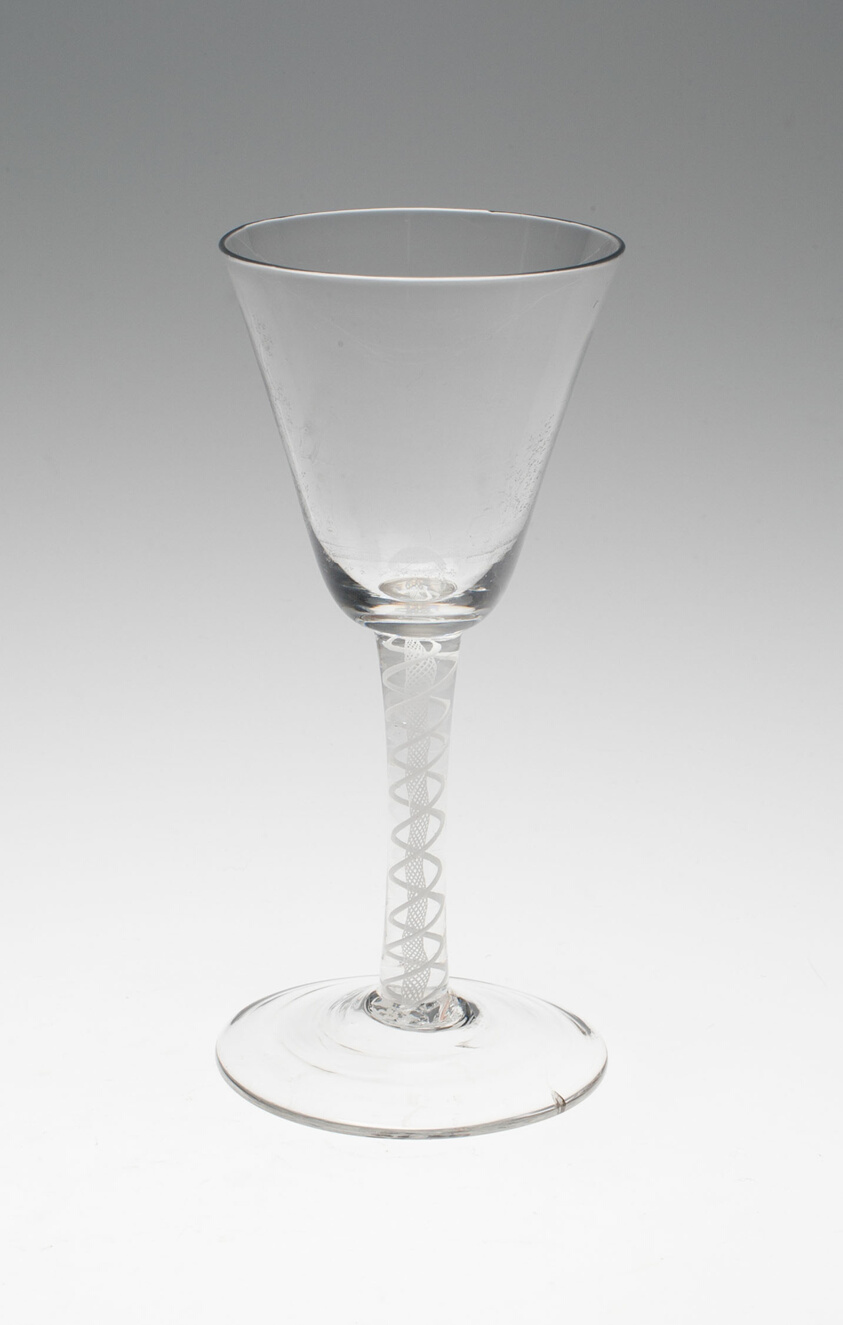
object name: Glass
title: Wine Glass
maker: England or Netherlands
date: c. 1760/80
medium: Glass; stipple engraved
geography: England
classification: drinking vessel; glass; european decorative arts